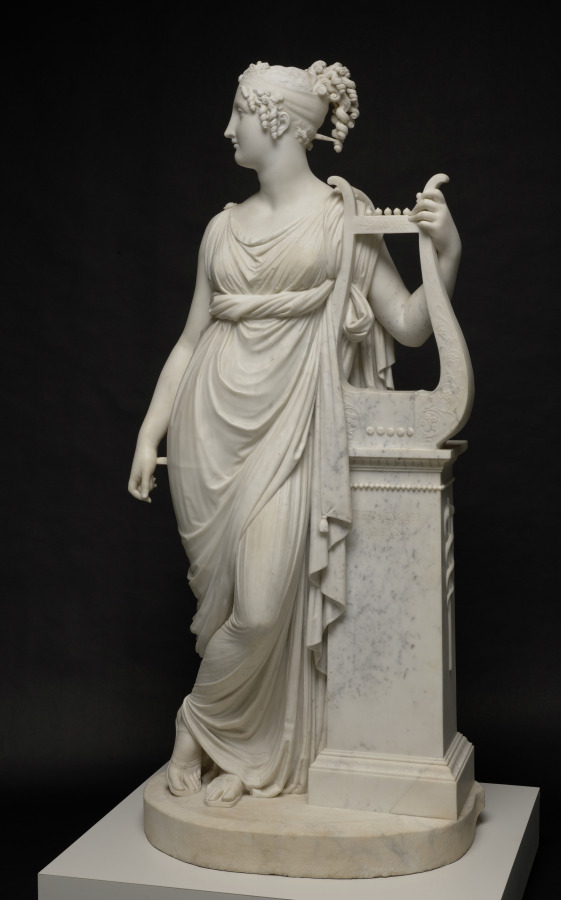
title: Terpsichore Lyran (Muse of Lyric Poetry)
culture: Italy, 19th century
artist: Antonio Canova (Italian, 1757–1822)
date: 1816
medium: marble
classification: Sculpture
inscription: inscribed on front of column: "Terpsichore Lyran" [Terpsichore as the Muse of lyric poetry]; inscribed at base of column: "Canova Fact: 1816"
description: In Greek mythology, Terpsichore was one of the nine Muses, or goddesses of creative inspiration. The lyre, the Greek inscription on the short column, and the caduceus (entwined snakes) on the side identify the figure as Terpsichore Lyran, muse of lyric poetry. This sculpture began with a commission from Napoleon's brother, Lucien, for an idealized portrait of his wife, Alexandrine. Antonio Canova made this version for a British aristocrat and exhibited it in 1817 at the Royal Academy in London to great acclaim.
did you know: Trained by his grandfather, an Italian stonemason, Canova began modeling clay and carving marble sculptures before age ten.